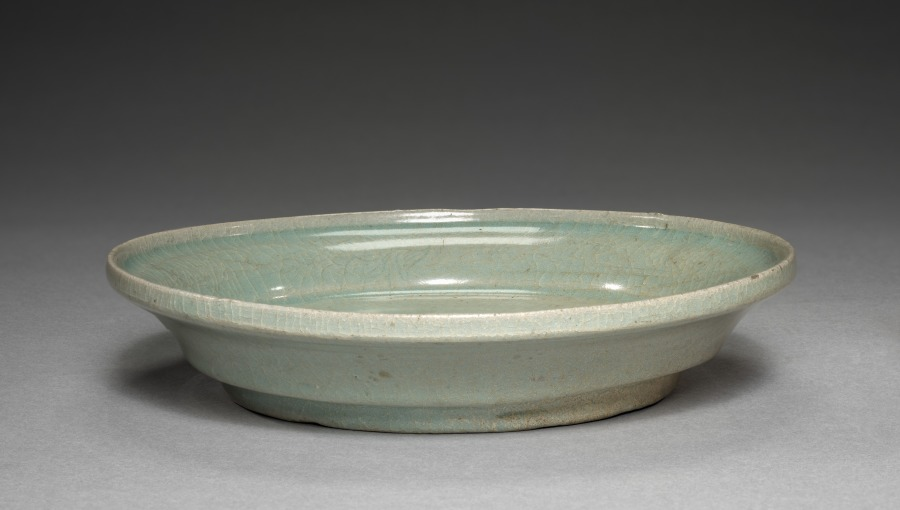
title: Bowl and Saucer with Incised Lotus and Peony Design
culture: Korea, Goryeo dynasty (918–1392)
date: 1100s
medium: pottery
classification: Ceramic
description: As early as the seventh century, the practice of drinking tea and wine became an important part of elite culture in Korea. Elites of the Goryeo period commissioned a variety of types of utensils and vessels including this saucer paired with a large bowl, to make their drinking experience more exciting.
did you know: This type of celadon bowl was modeled after Ru ware of northern China. Xu Jing (1091-1153), the Chinese official who visited Korea in 1123, called the Korean celadon ware as the “new kiln ware of Ru-zhou.”